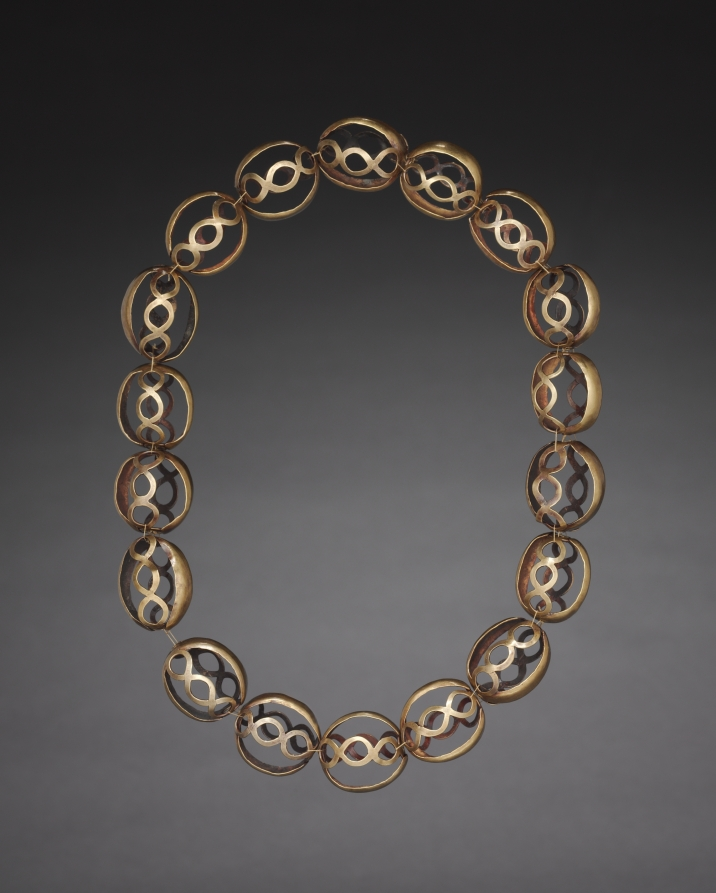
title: Necklace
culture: Peru, North Highlands, Chavín de Huantar(?), Chavín style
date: c. 500–200 BCE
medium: hammered and cut gold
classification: Metalwork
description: There seems to be a link between Chavín religion and appearance of the Andes’ first large precious-metal objects, made using revolutionary new metallurgical processes. Chavín may have developed these technical innovations to express the inexpressible, the "wholly other" nature of its religion. In many areas, elite men and women wore the ornaments as emblems of their ties to this religion, and eventually were buried with them. These 16 objects, along with three others not in the museum’s collection, are said to have come as a group from Chavín itself.